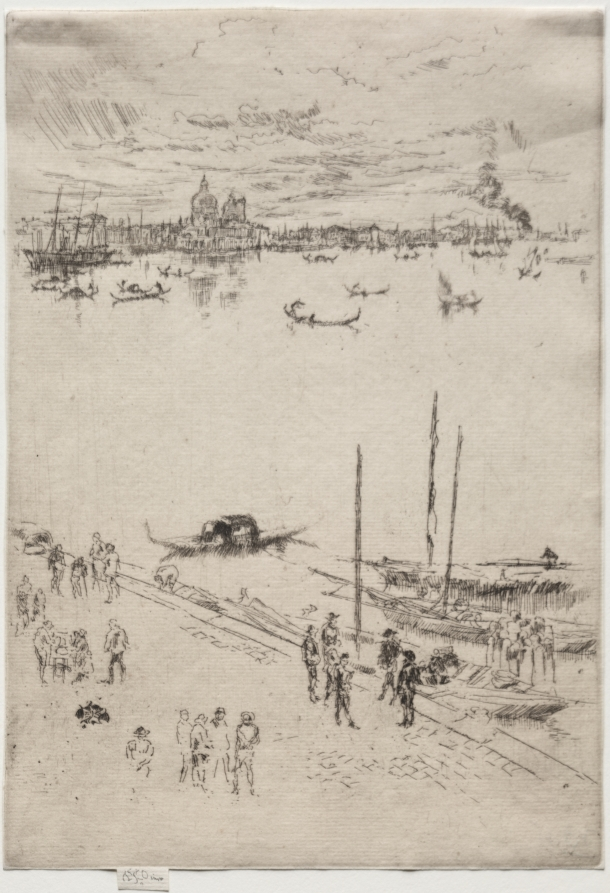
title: Upright Venice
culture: America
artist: James McNeill Whistler (American, 1834–1903)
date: 1879–80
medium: etching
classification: Print